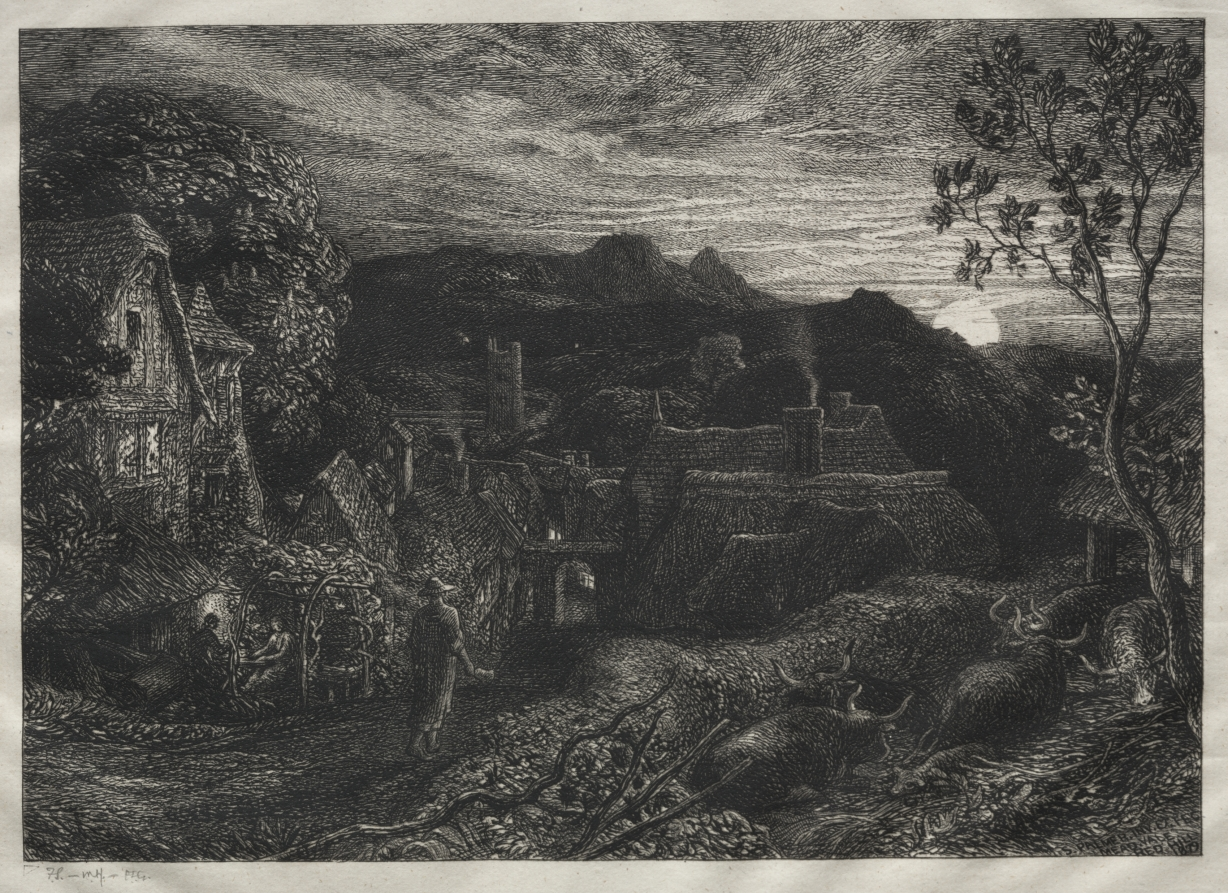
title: The Bellman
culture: England, 19th century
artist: Samuel Palmer (British, 1805–1881)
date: 1879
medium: etching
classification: Print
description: In a highly personal style, Palmer combined minute study of natural details with Gothic features from early Northern art and figure types borrowed from William Blake (also in this gallery). His moonlit landscapes of Kent appear as a fruitful, mysterious paradise, populated by a race of rustic heroes, personifications of pastoral contentment.